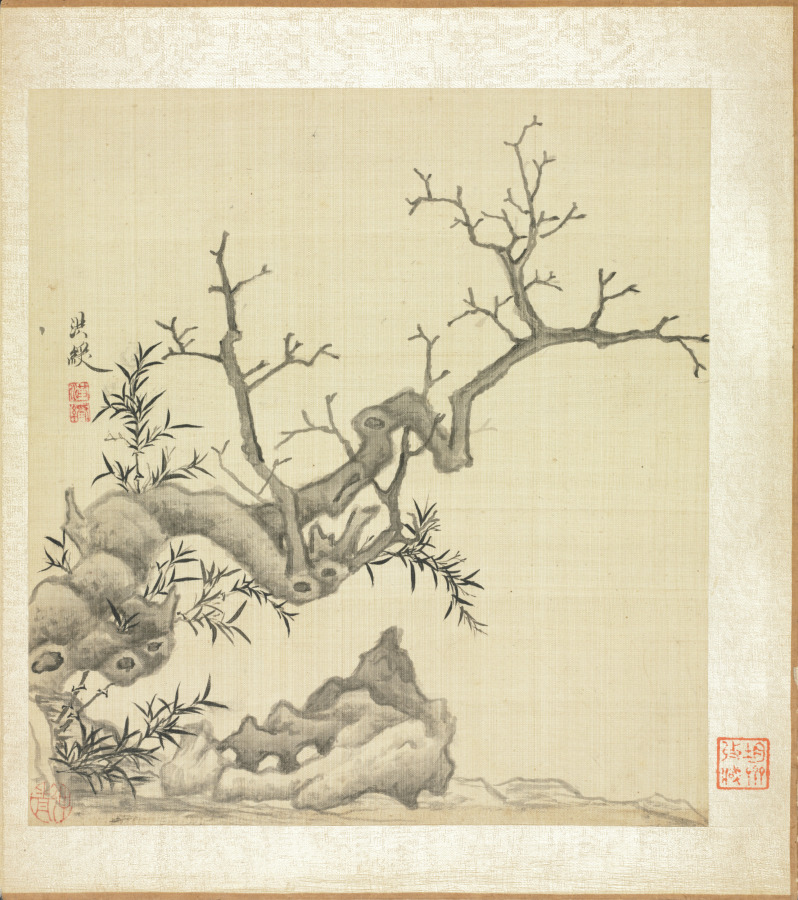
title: Paintings after Ancient Masters: Rock, Old Tree, and Bamboo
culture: China, Ming dynasty (1368–1644)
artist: Chen Hongshou (Chinese, 1598/99–1652)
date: 1598–1652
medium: album leaf, ink and color on silk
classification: Painting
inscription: Hongshou [seal] Hongshou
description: The twenty paintings in this double-album by Chen Hongshou include landscapes, figures, and flowers. It also has one leaf featuring a woman, an often-used subject not found in the other albums from the latter part of his career. His late works are wonderful summations of Chen's peculiar and quirky art--archaistic, hyper-refined--but without accompanying shallowness or sentimentality. His figures and landscapes in the late albums are miniaturized, not unlike the small Chinese gardens, or the carefully selected small table rocks or old roots used for contemplation to see the world in miniature. This loss of scale is quite deliberate and reflects the psychological situation of a depressed class like the Ming loyalist officials and scholars, deprived of their integrity and honor, and forced to lead a diminished and restricted existence.